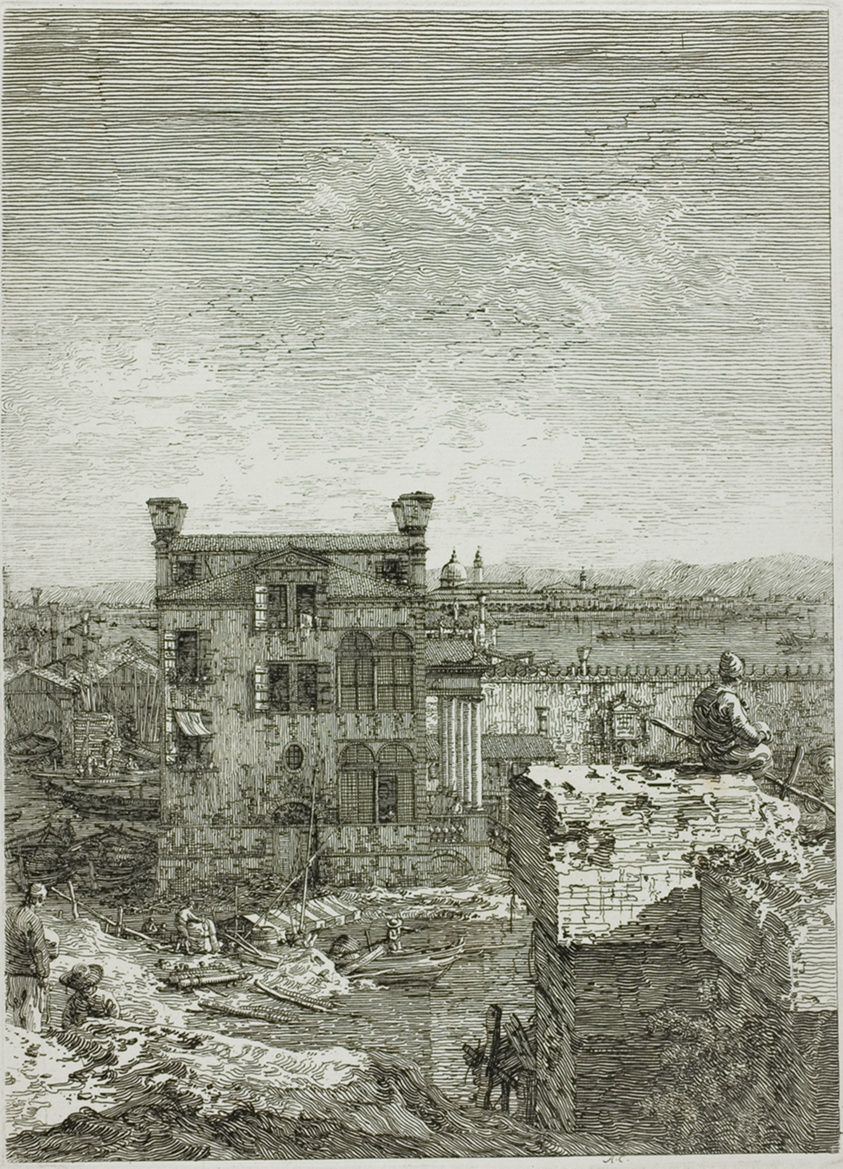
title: The House with the Peristyle, from Vedute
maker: Canaletto (Italian, 1697-1768)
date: 1735/44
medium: Etching in black on ivory laid paper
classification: etching; print